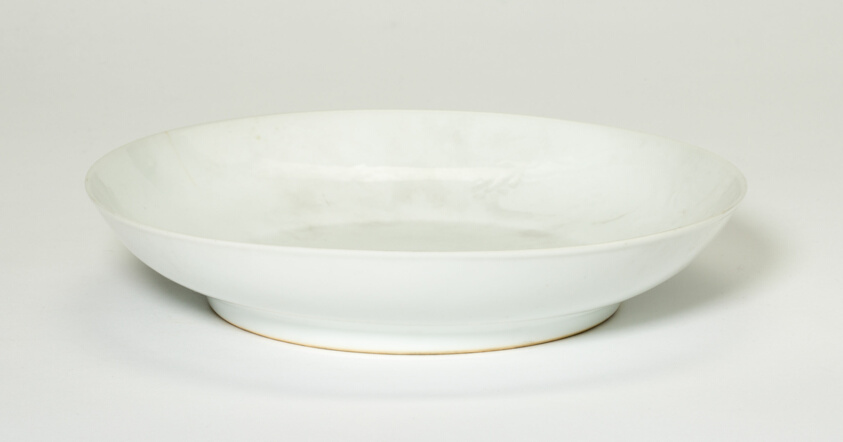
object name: Vessel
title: Dish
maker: China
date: Ming dynasty (1368–1644), Hongzhi reign mark and period (1488–1505)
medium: Glazed porcelain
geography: China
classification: porcelain; asian art; ceramics; vessel